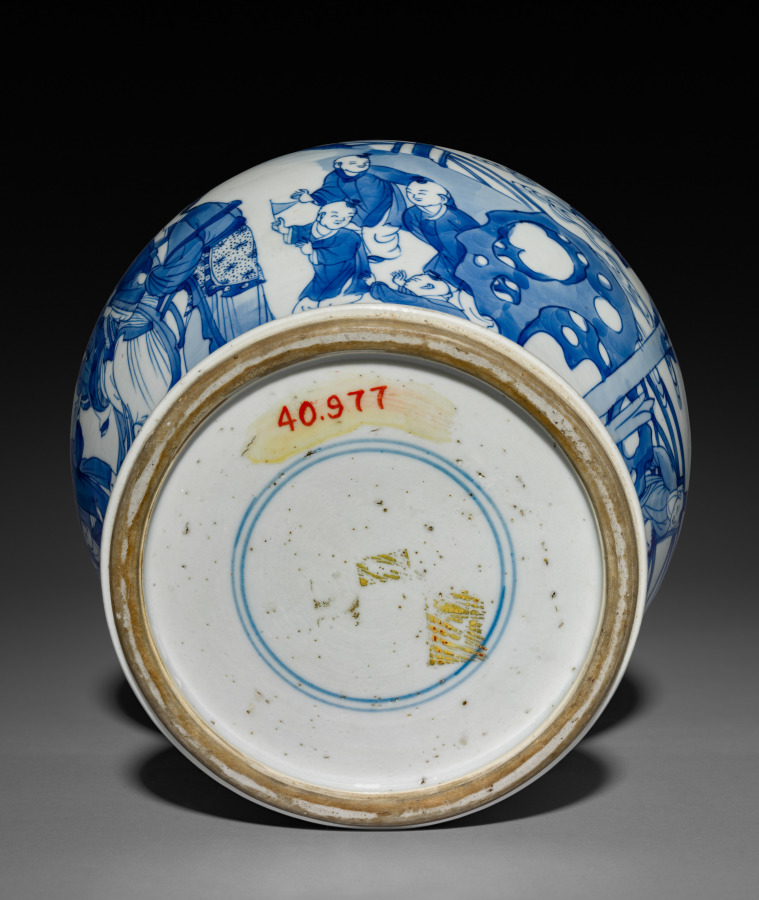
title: Vase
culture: China, Qing dynasty (1644–1911), Qianlong reign (1736–95)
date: 1736–95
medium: porcelain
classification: Ceramic